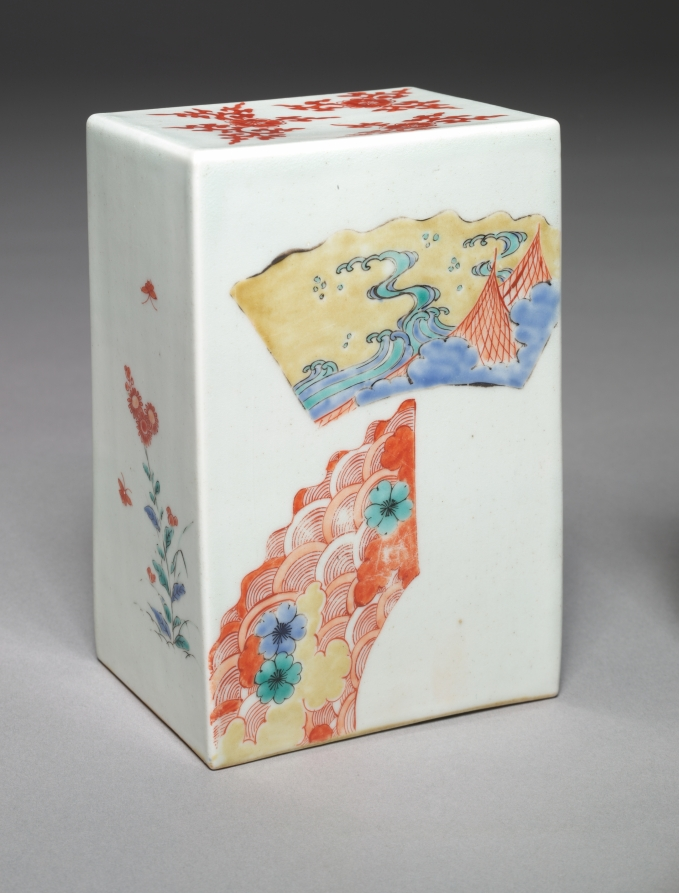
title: Pillow with Fan and Floral Decoration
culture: Japan, Edo period (1615–1868)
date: late 1600s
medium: porcelain with overglaze color enamel (Hizen ware, Kakiemon type)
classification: Ceramic